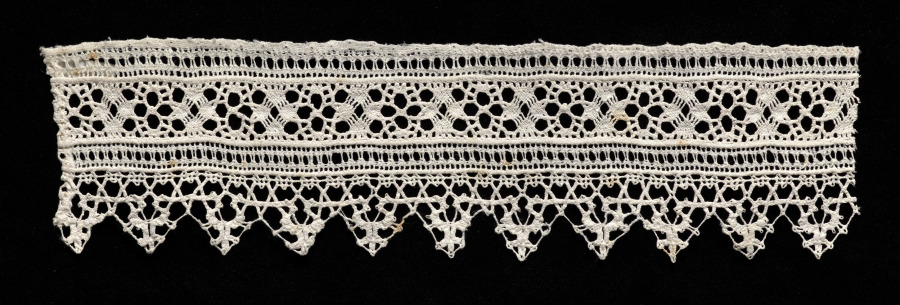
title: Lace fragment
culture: Italy, 1600s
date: 1600s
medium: Needle lace (drawnwork) insertion with bobbin lace edging of points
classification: Lace